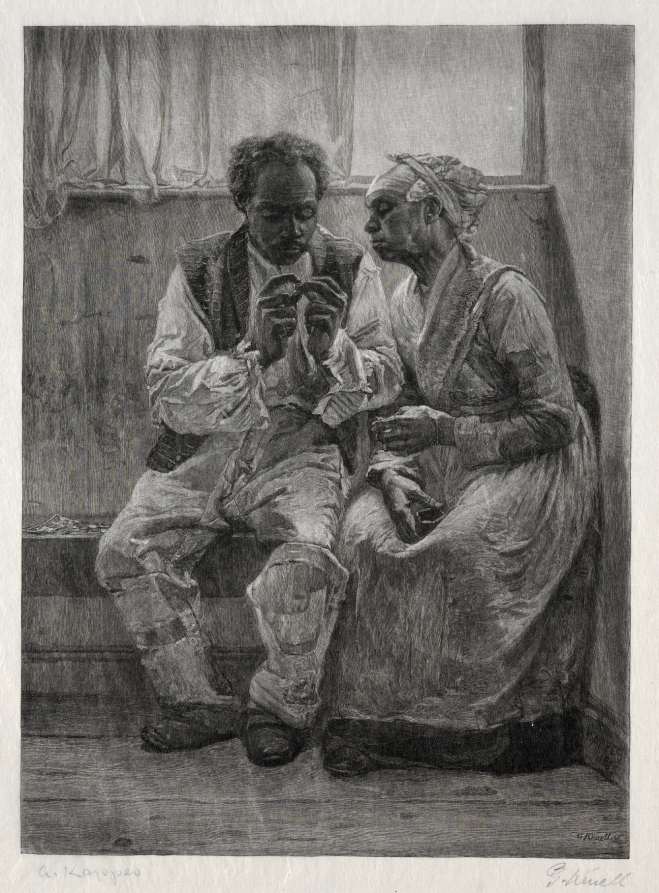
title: Rent Day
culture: America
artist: Gustav Kruell (American, 1843–1907)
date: 1887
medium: wood engraving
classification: Print